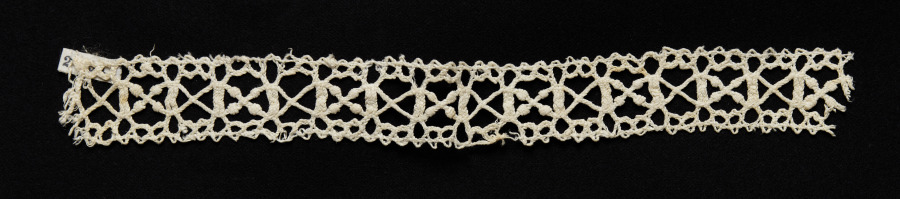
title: Lace Insertion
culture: Italy, Genoa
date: 1550–99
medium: Bobbin lace (needle lace, reticella design)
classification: Lace